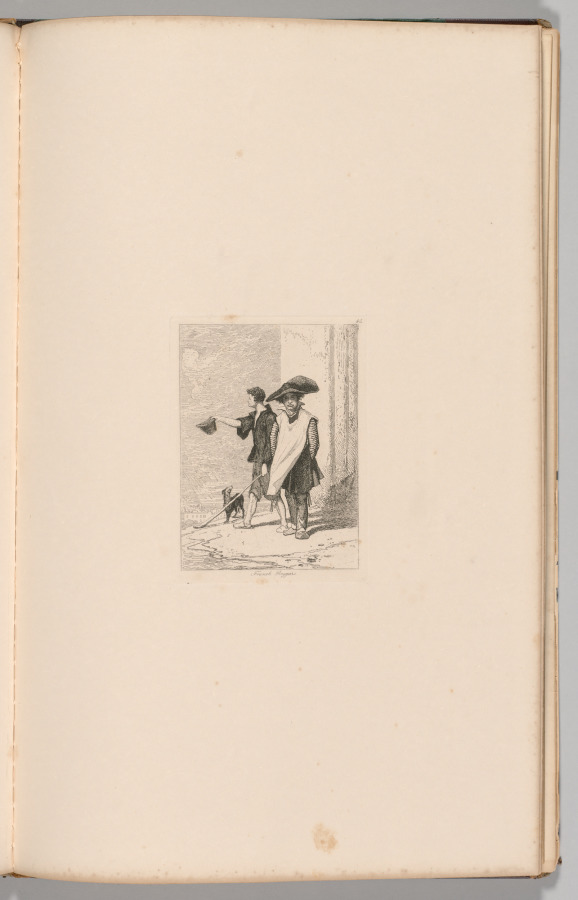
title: Liber Studiorum: Plate 45, French Beggars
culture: England, 19th century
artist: John Sell Cotman (British, 1782–1842)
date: 1838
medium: softground etching, from a bound volume containing 48 plates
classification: Bound Volume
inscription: In plate, within image, upper right: 45; in plate, below image: French Beggars